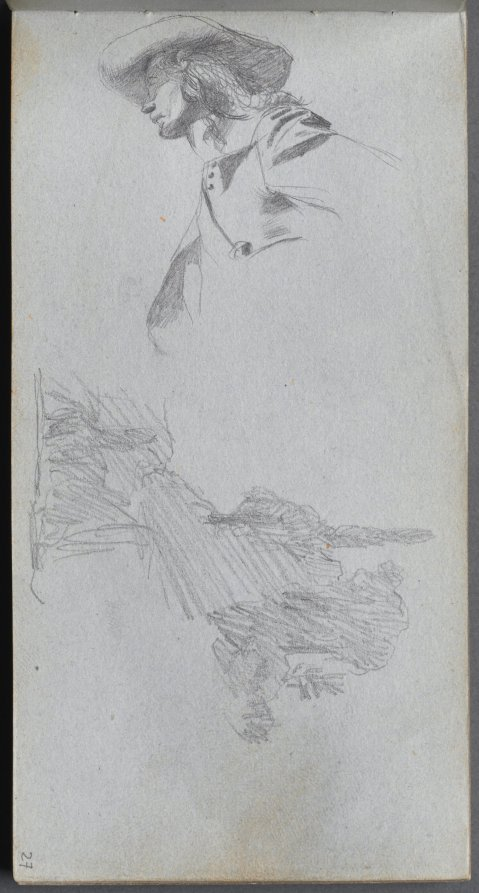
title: Sketchbook, page 27: Detail Study for "On a Terrace" and Landscape Study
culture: France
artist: Ernest Meissonier (French, 1815–1891)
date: c. 1860s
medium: graphite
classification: Bound Volume